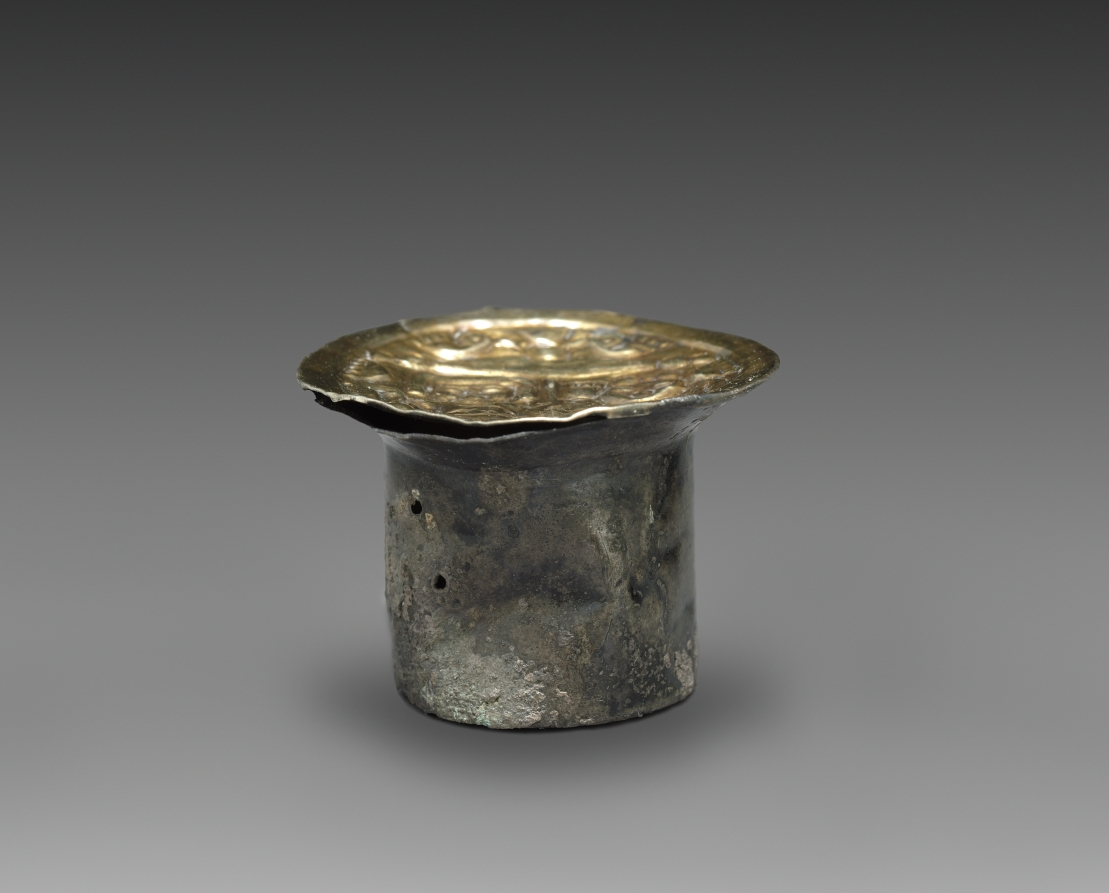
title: Ear Ornament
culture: Peru, North Coast, Sicán, 9th-14th Century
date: c. 800–1370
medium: hammered and embossed gold alloy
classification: Metalwork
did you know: Wearing large ear ornaments, a privilege of the nobility, permanently stretched the earlobes.